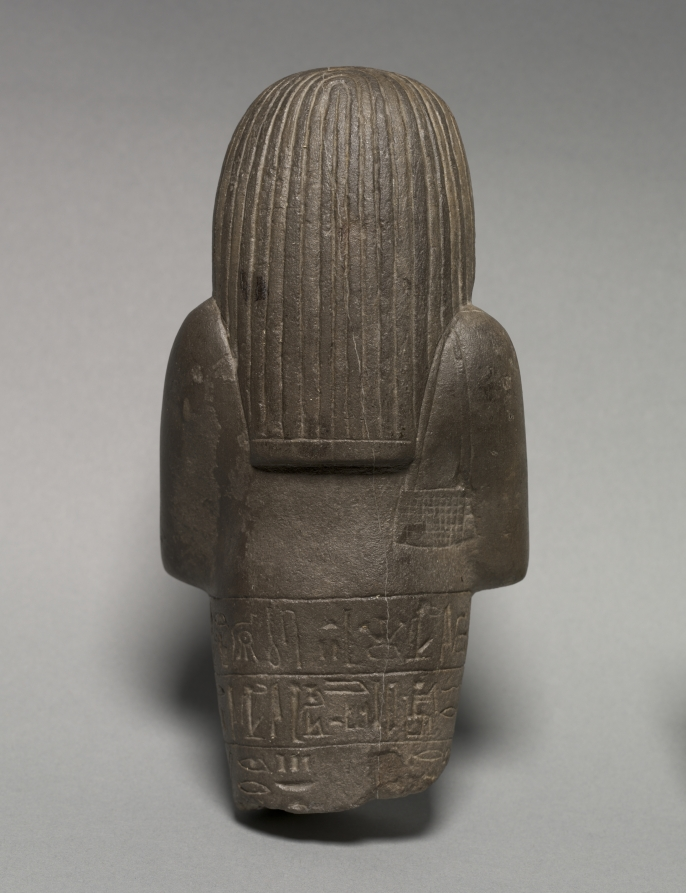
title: Shawabty of Ranefer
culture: Egypt, New Kingdom (1540–1069 BCE)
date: 1336–1295 BCE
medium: limestone, originally painted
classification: Funerary Equipment